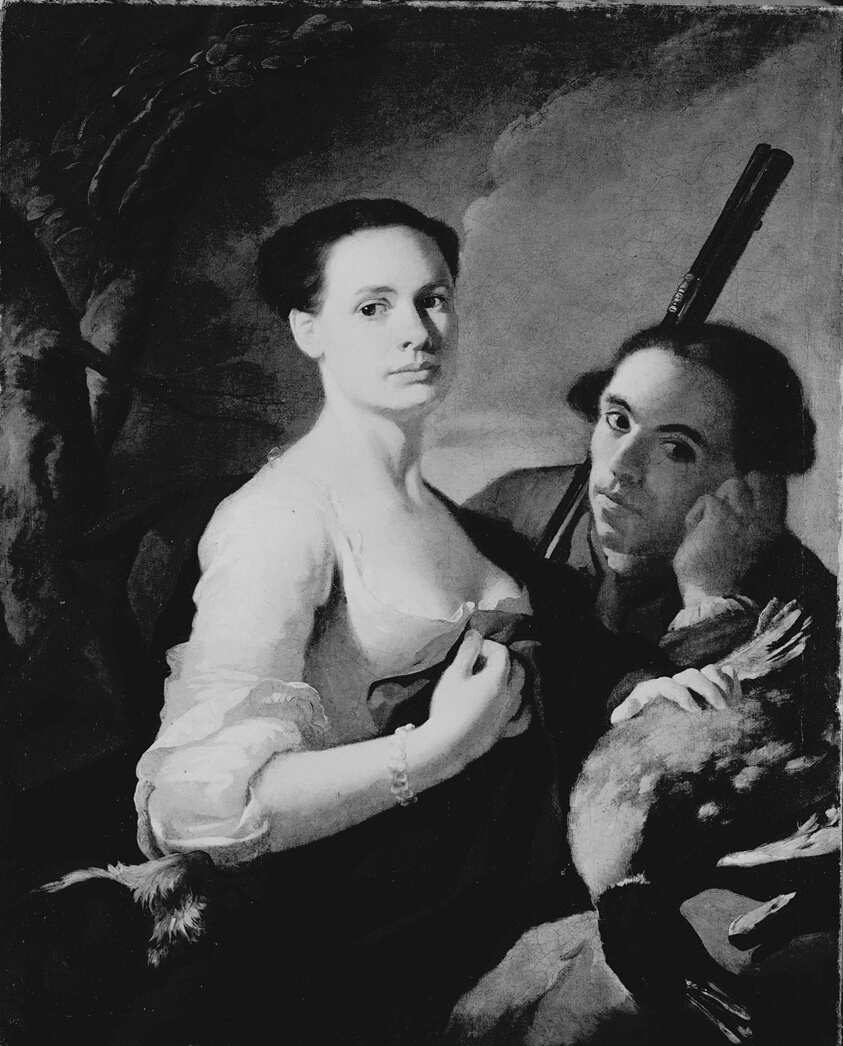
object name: Painting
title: Young Woman with Hunter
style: 18th Century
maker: Artist unknown (Italian, active 18th century)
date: c. 1750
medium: Oil on canvas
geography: Italy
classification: oil on canvas; Italian; oil paintings (visual works); paint; painting; european painting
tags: portrait, trees, guns, bird, dresser, hunter, man, portraits: female subject, portraits: male subject, woman